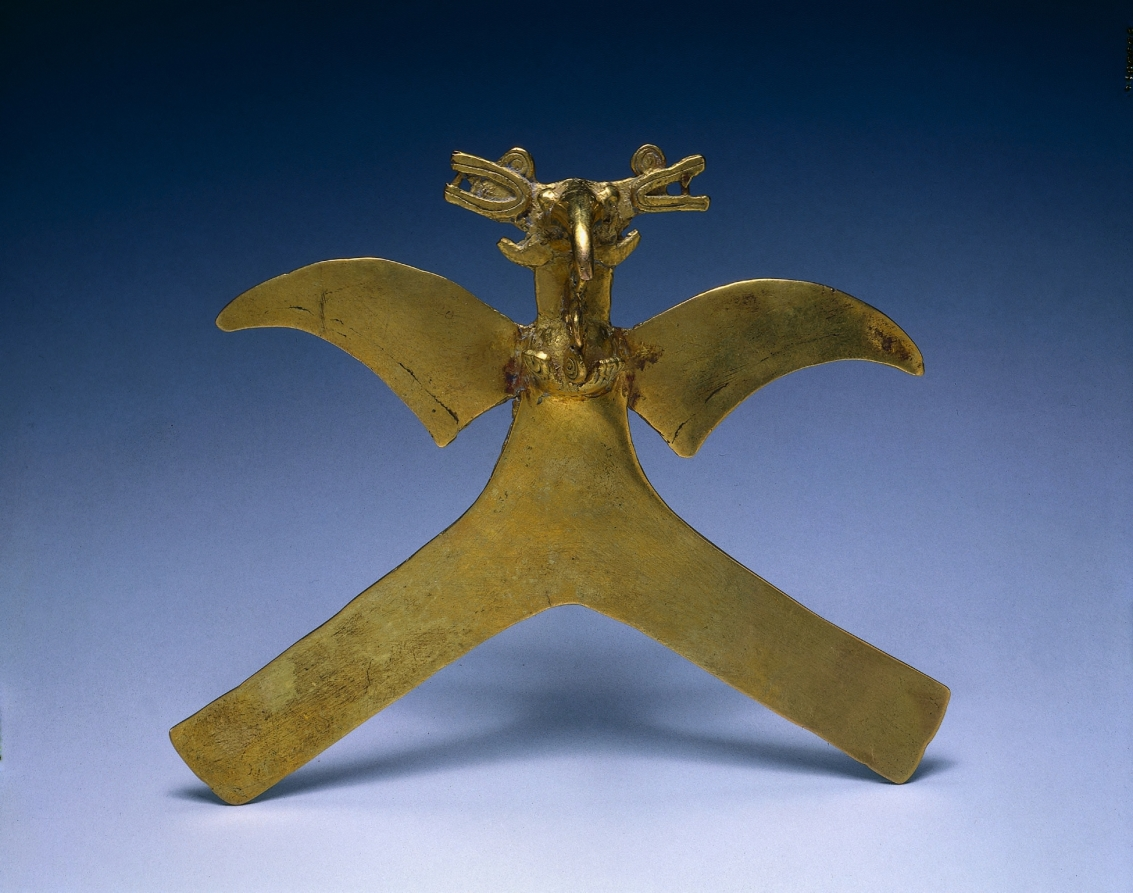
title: Bird Pendant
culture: Costa Rica, Diquís region, or Panama, 11th-16th century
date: c. 1000–1550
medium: cast gold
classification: Metalwork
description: Among the pendants shown here are a crustacean (1943.290), an animal-headed figure (1948.18), and two pendants featuring birds (1951.442 and 1946.223). The latter were dubbed aguilas (eagles) by Christopher Columbus, who saw natives wearing them as necklace ornaments. Modern researchers are not as sure of the species shown, but some believe that they are birds of prey because talons and beaks are prominent and often clutch something, in one example here a small, disembodied head that holds a clapper. In both examples, two tufts in the form of crocodiles in profile flank the birds’ heads.